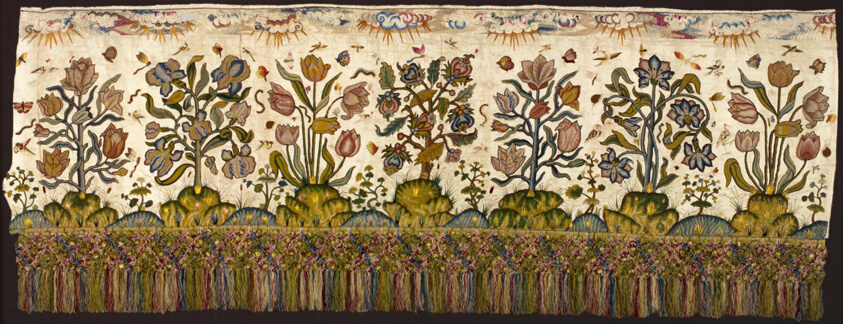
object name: Coverings and Hangings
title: Valance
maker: England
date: 1620/60s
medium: Silk, warp-float faced 7:1 satin weave; appliquéd with hemp and linen, plain weaves; embroidered with silk and silk chenille in satin and tent stitches; laid work and couching raised work over cotton padding; and embroidered with silk and feathers in running, satin, single satin, and stem stitches; laid work and couching; edged with silk, plied cords and cotton, plain weave; lined with linen, plain weave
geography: England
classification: textile; needlework (visual works)